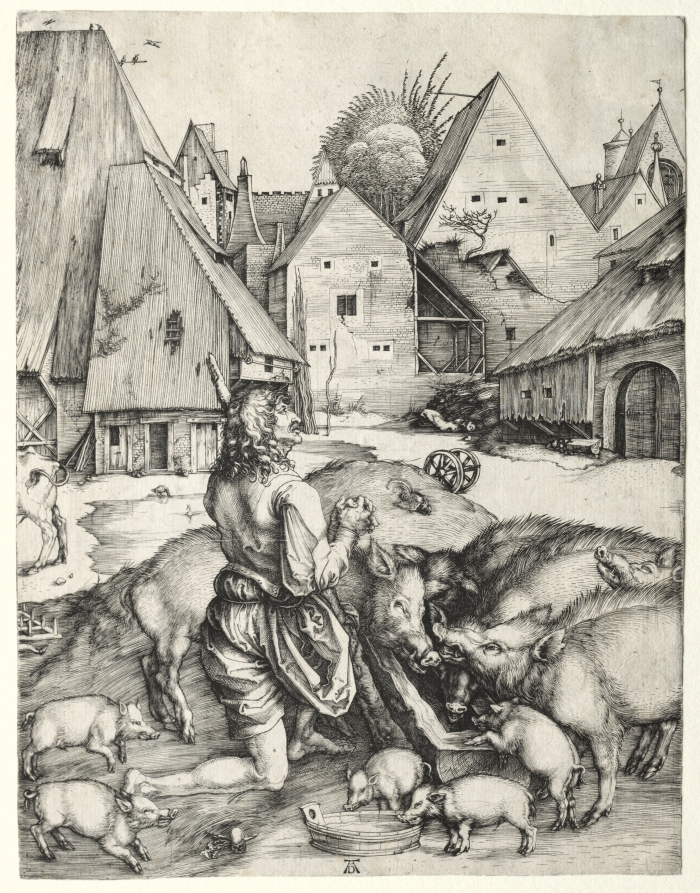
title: The Prodigal Son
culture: Germany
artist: Albrecht Dürer (German, 1471–1528)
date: c. 1496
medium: engraving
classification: Print